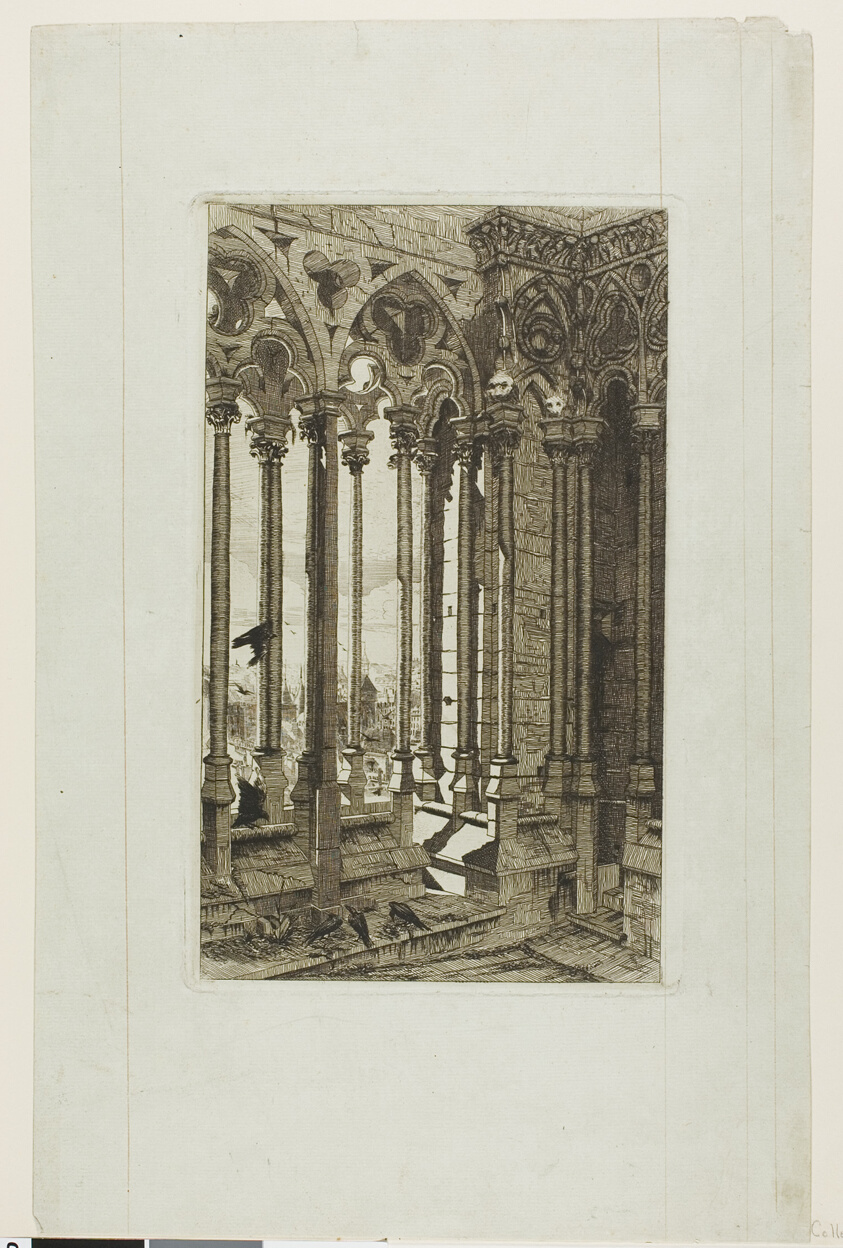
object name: Print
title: The Gallery of Notre-Dame, Paris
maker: Edmond Gosselin (French, 19th century); after Charles Meryon (French, 1821-1868)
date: 1853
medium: Etching on verdâtre (greenish) laid paper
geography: France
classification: etching; print; prints and drawing